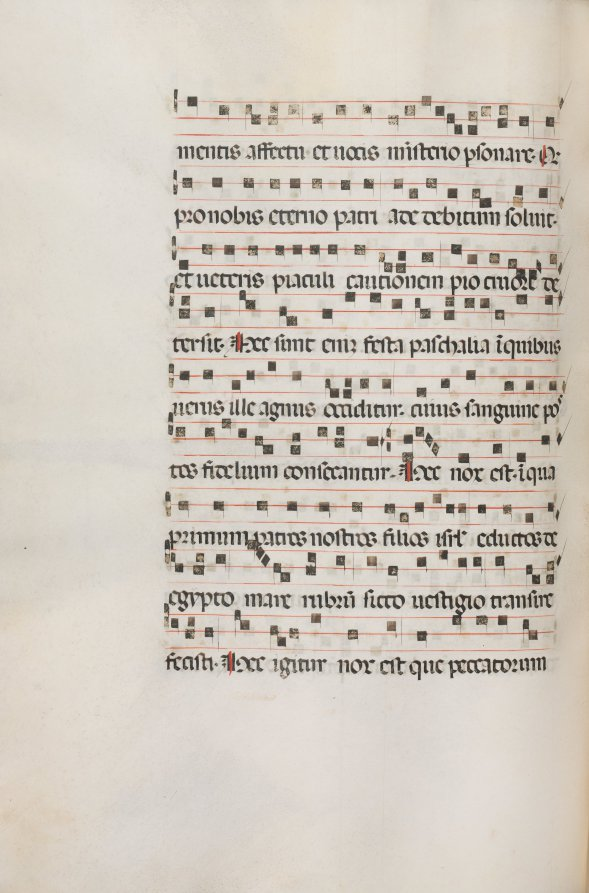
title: Missale: Fol. 154v: Music for "Exultet"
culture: Italy, Perugia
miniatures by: Bartolommeo Caporali (Italian, c. 1420–1503)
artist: assisted by Giapeco Caporali (Italian, d. 1478)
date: 1469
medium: ink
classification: Bound Volume